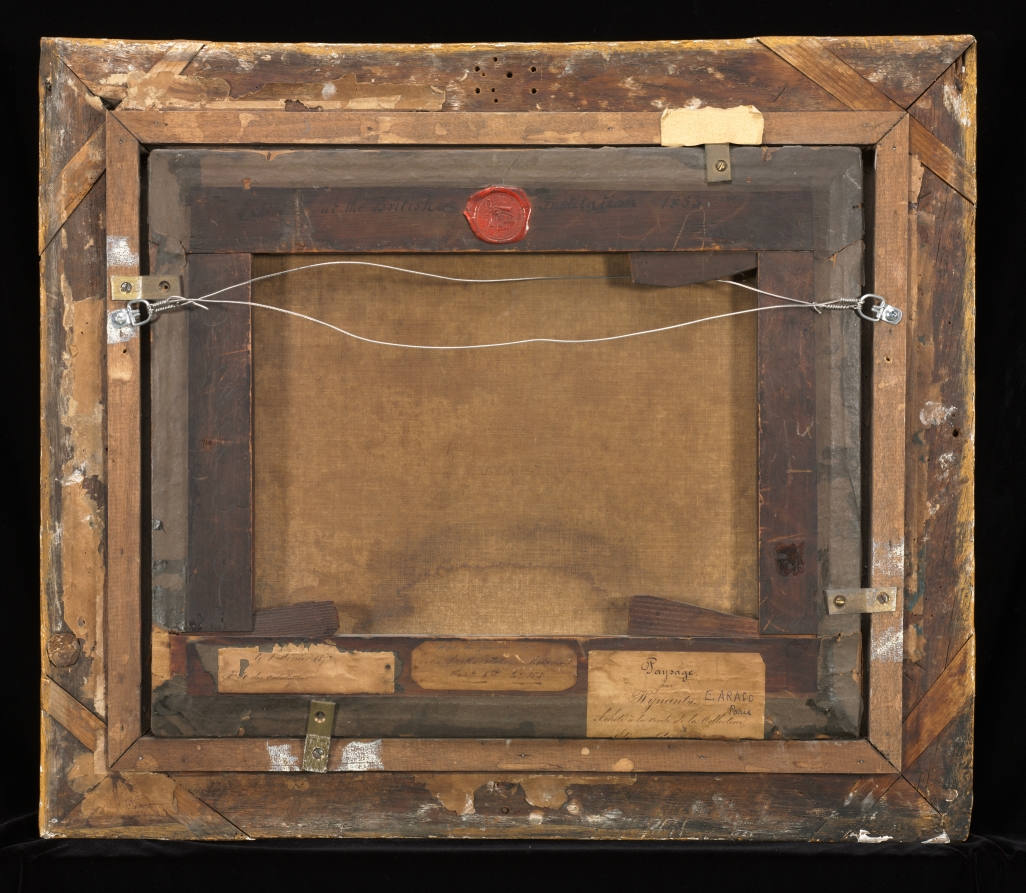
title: Landscape with Hunters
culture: Netherlands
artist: Jan Wijnants (Dutch, 1635–1684)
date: c. 1660–80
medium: oil on canvas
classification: Painting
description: Dune landscapes were a subject of great interest in seventeenth-century Netherlands, among the earliest subjects for independent landscape. They were the bread-and-butter speciality for Wijnants, whose far more unusual Amsterdam canal scene is also in the collection of the CMA.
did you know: To supplement his income as a painter, Jan Wijnants also owned an inn.